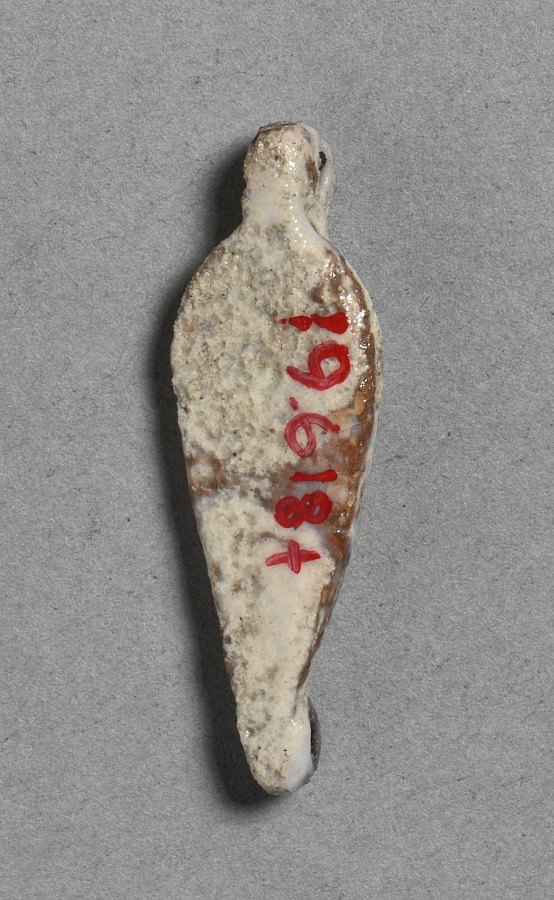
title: Petal-Shaped Bead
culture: Egypt, New Kingdom (1540–1069 BCE), Dynasty 18, reign of Amenhotep III (1390–1352 BCE)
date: c. 1391–1353 BCE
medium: faience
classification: Jewelry